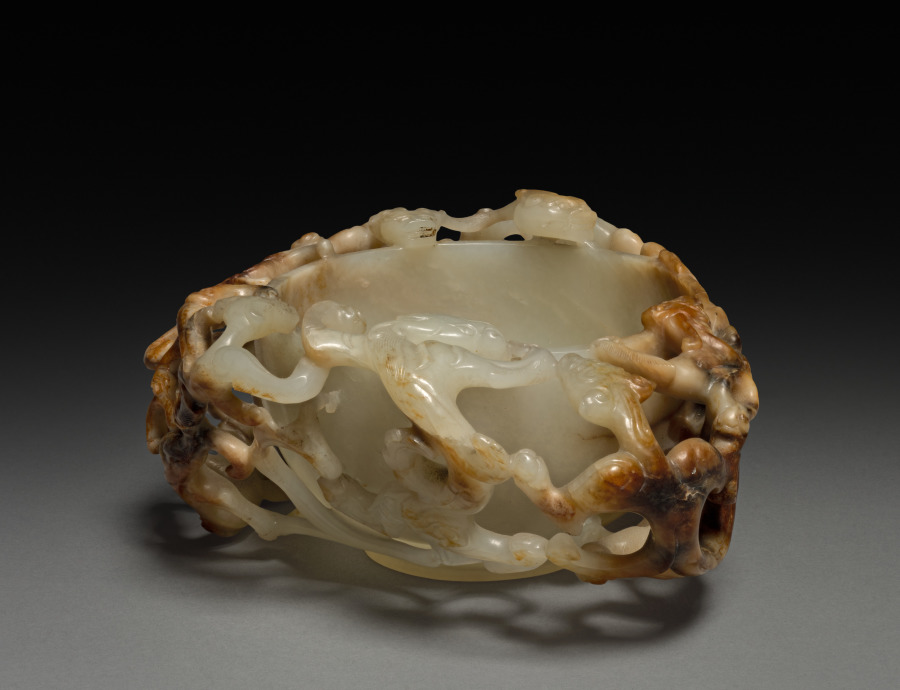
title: Cup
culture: China, Qing dynasty (1644–1911), Qianlong reign (1736–95)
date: 1736–95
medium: jade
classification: Jade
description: In the Qing dynasty, luxury items became more affordable to larger parts of the society, including women, merchants, and literati in nonofficial positions. Imperial patronage and a growing urban population also encouraged consumption of luxury goods and local craftmanship. This cup with open-work interlacing dragons shows the creative mind of the skilled artisan who carved it from a round piece of jade.